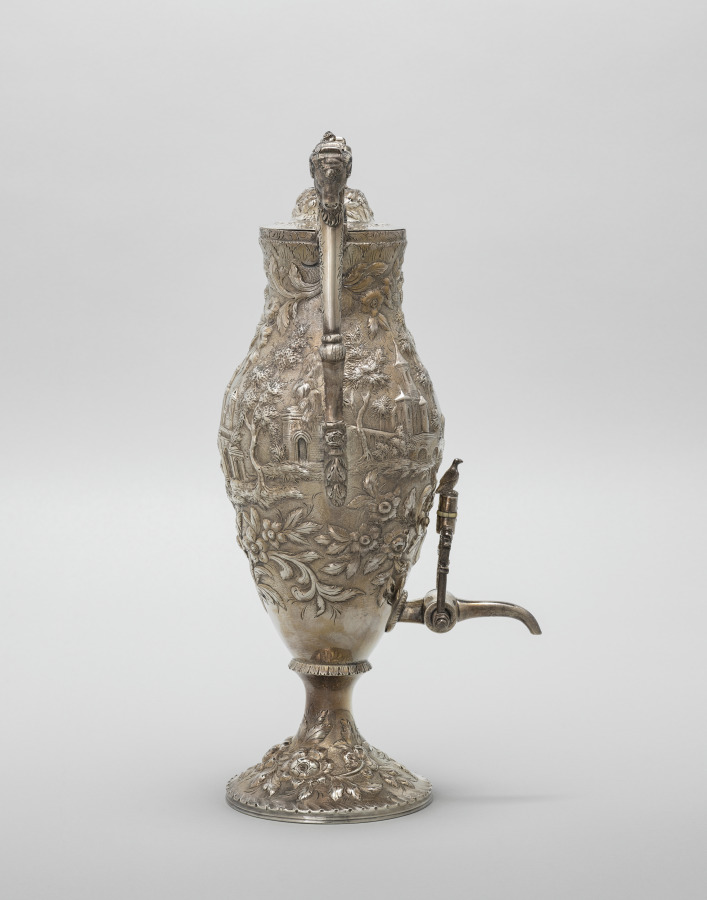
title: Coffee Urn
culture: America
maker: Samuel Kirk (American, 1793–1872)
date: c. 1843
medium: Silver, ivory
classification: Silver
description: Samuel Kirk was a leading American silversmith in the early 19th century whose Baltimore studio had became a major American silver company that thrived throughout the middle of the 20th century. Such a large, impressive coffee urn as this highly decorated example was considered the ultimate in Samuel Kirk silver and was largely made by hand.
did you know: The decoration on this coffee urn was achieved through a technique known as "repousse" in which the design was hammered into relief from behind.